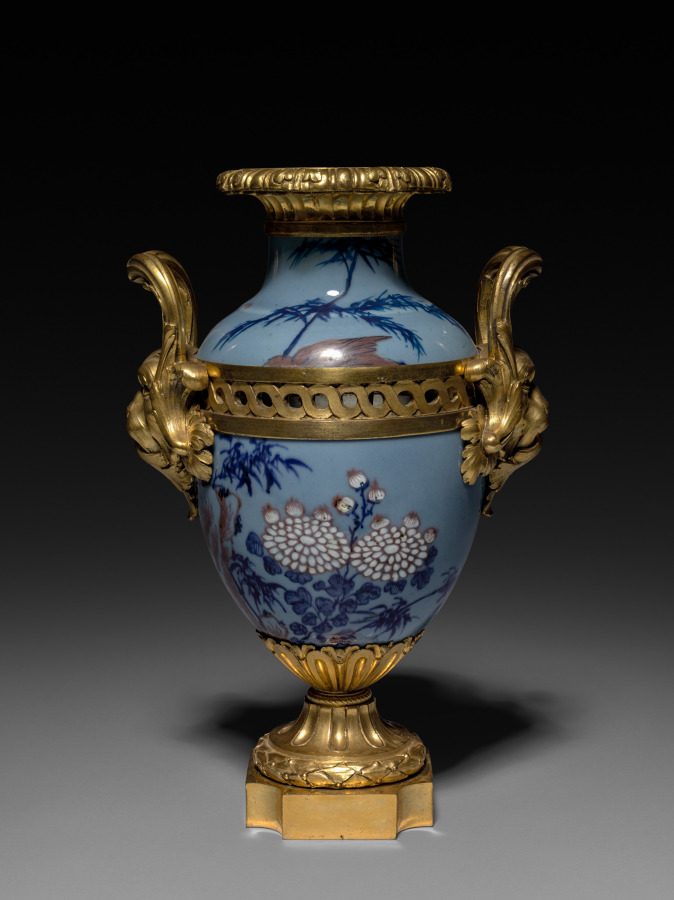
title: Garniture Set (one clock and 2 vases)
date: 1736–1770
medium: Chinese hard-paste porcelain, gilt bronze, enameled metal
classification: Furniture and woodwork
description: The fascination with Chinese porcelain among aristocratic circles increased during the reign of Louis XV. In reaction to the perceived excesses of elaborate naturalistic ornament of the 1750s, mount makers increasingly turned to neoclassical designs, known as Goût Grec (Greek taste) in the 1760s and 1770s. These beautifully chased gilt-bronze mounts feature classical Greco-Roman motifs such as lion masks, acanthus and laurel leaves, and pilasters.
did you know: A set of vases and clock, connected visually by the use of the same materials, often adorned a mantlepiece or the top of a large piece of furniture, such as a commode or console, within a room.